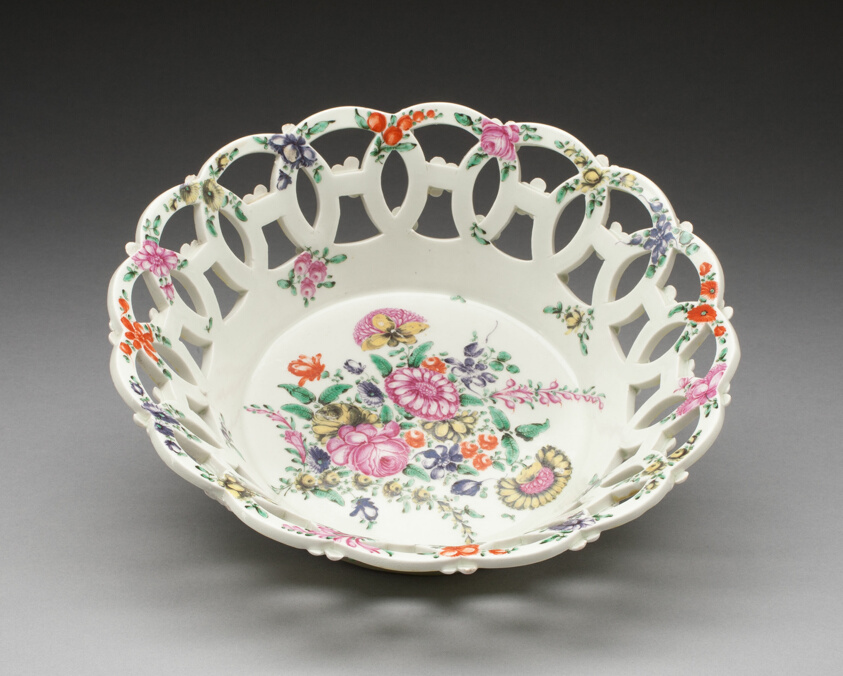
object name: Ceramics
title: Basket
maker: Worcester Porcelain Factory (Warmstry House Period, 1751–1783); Worcester, England, founded 1751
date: c. 1770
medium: Soft-paste porcelain with polychrome enamels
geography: Worcester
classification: tableware; porcelain; european decorative arts; ceramics